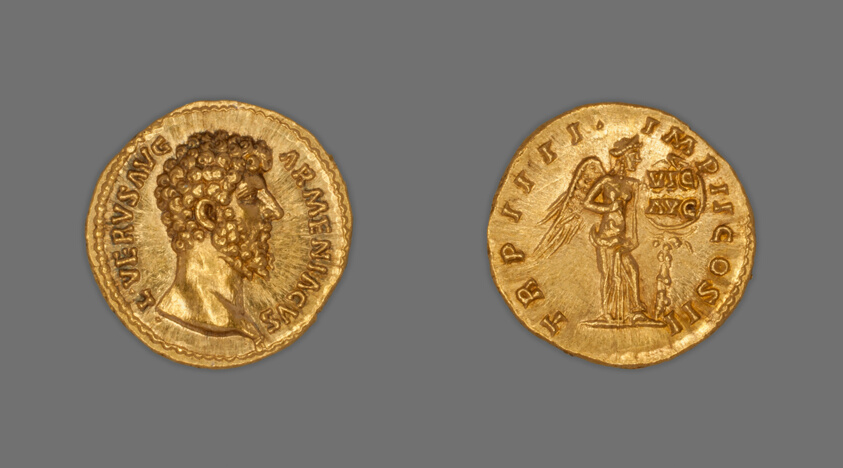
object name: Coin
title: Aureus (Coin) Portraying Emperor Lucius Verus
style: imperial (roman), ancient, roman (ancient, style or period)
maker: Roman, minted in Rome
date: December 163-December 164, issued by Marcus Aurelius and Lucius Verus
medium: Gold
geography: Rome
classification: coin; ancient art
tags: portraits